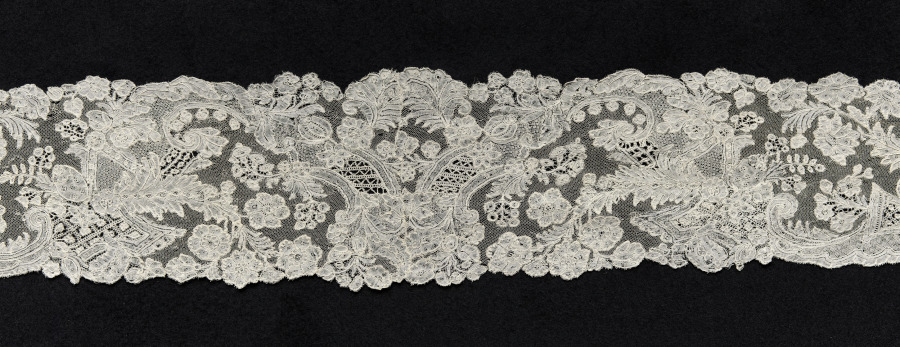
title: Lace Lappet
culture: Belgium, Brussels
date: 1700s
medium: Linen: bobbin lace (Point d'Angleterre)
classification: Lace